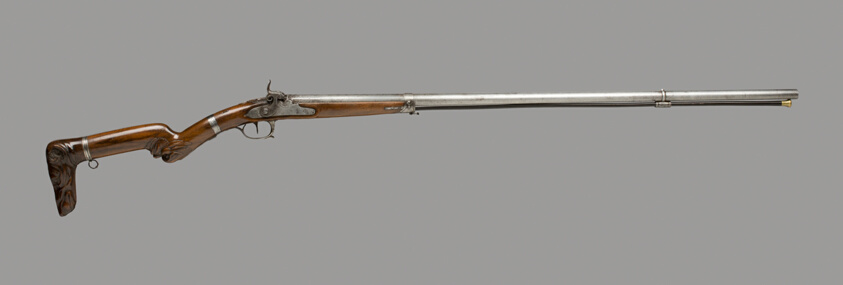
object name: Arms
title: Percussion Fowling Piece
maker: Attributed to Berthon-Perrin; French, Aix-en-Provence, recorded 1800-1820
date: 1810/20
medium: Walnut, steel, silver, and baleen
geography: France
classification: firearm-long gun; arms; arms and armor